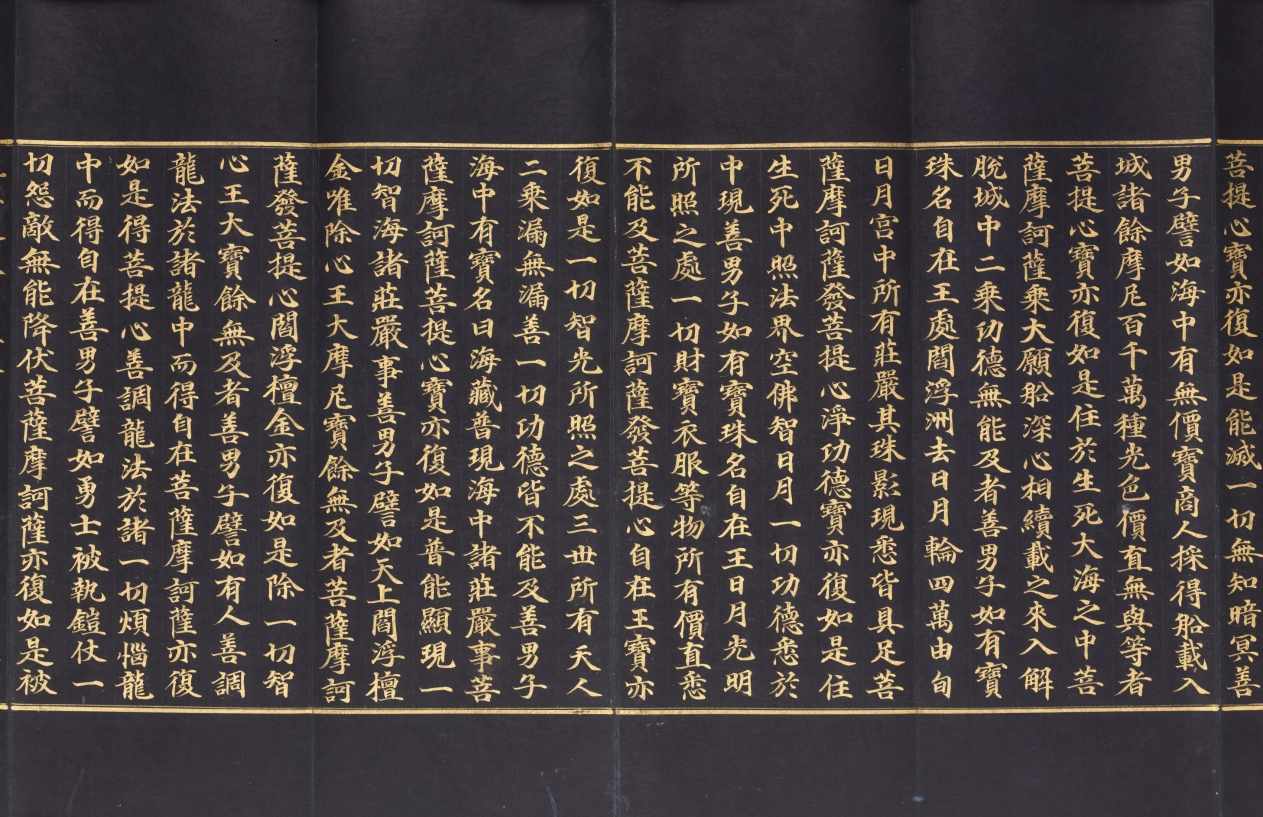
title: Avatamsaka Sutra No. 78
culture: Korea, Goryeo dynasty (918–1392)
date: 1300s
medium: Folded book with illustrated frontispiece; gold and silver on mulberry paper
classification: Bound Volume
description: This illuminated manuscript presents one part of the multivolume sacred text titled Avatamsaka (Flower Garland) sutra. Both the script and the image are rendered in gold ink on the smooth surface of the dark blue, indigo-dyed mulberry paper. This portion of the text, which reads from right to left, describes the encounter of the Buddha of the Future (Maitreya) and the young pilgrim Sudhana. The Buddha gives his words of wisdom to Sudhana, who asks questions about the path toward spiritual awakening. Mixed with ink and glue, the gold has a brilliance that strikingly reflects Sudhana’s ardent quest for understanding the way to reach enlightenment.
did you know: The pristine condition of this manuscript indicates that it was rarely used after its creation, revealing that the act of making a manuscript rather than reading it was the main religious goal.